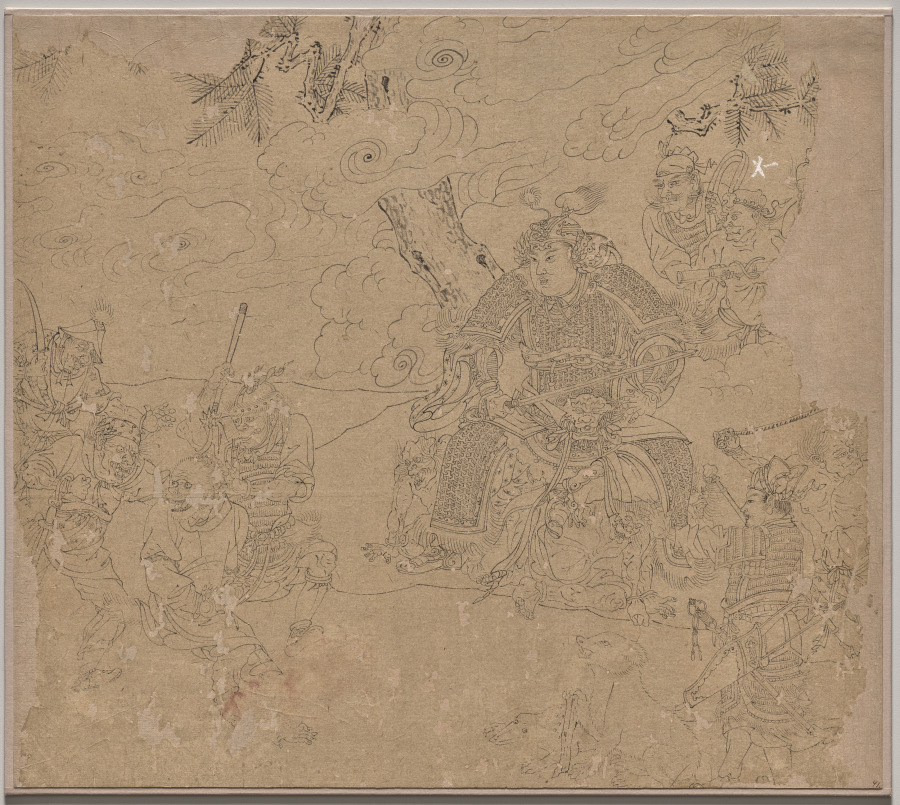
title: Album of Daoist and Buddhist Themes: Search the Mountain: Leaf 41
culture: China, Southern Song dynasty (1127-1279)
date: 1200s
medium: Album, ink on paper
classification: Painting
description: The principal—and largest—figure in this leaf depicts Erlang, a celestial commander in a popular myth. Here he wears full armor and holds his sword. Seated by a pine tree, he orders his celestial army to rid Mt. Guankou of the undesirable creatures in the wilderness, including a wolf, a small alligator, and a monkey dressed in human clothes. This subject was first painted by a Northern Song artist, Gao Yi, and remained popular through the Southern Song period and during the Ming dynasty. In this album, the Soushan Tu 搜山圖 (Search the Mountain) uses 10 leaves to complete its imagery. This is now the earliest known version of the narrative, as Gao Yi’s has not survived.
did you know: A commander in armor is seated on a devil, surrounded by three more. One of his lieutenants (right) is whirling a snake in the air. On the left, demon-soldiers surround a monkey with human body.